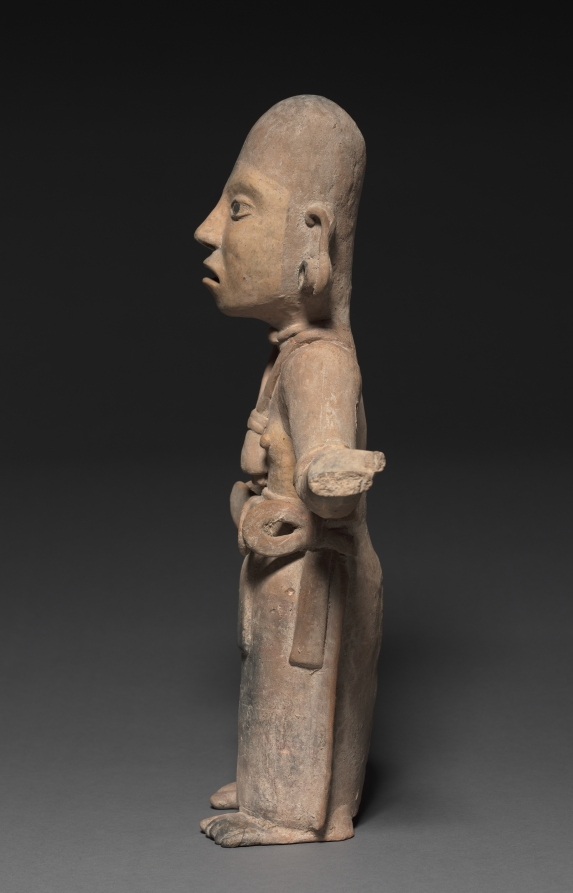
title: Female Figure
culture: Mexico, Southern Veracruz, Limon, Remojades Monumental Sculpture type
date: 200–500 CE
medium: pottery with burnished buff slip and asphalt paint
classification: Sculpture